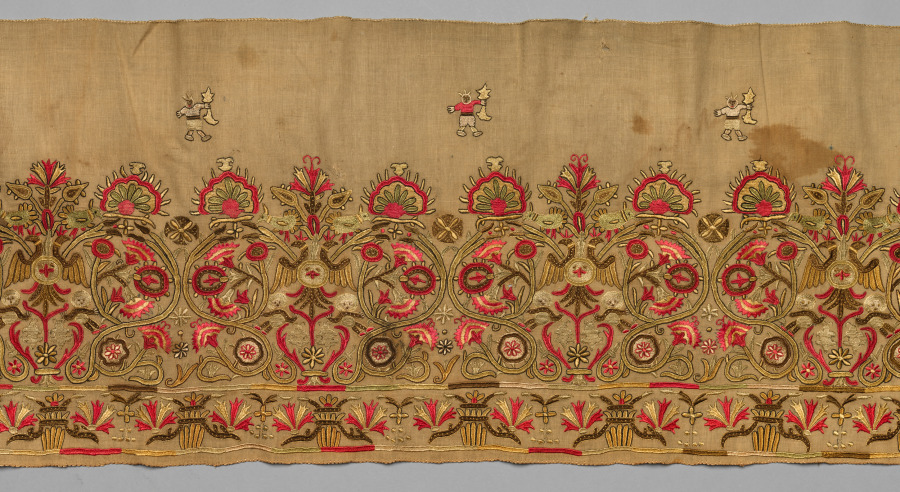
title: Complete Skirt Border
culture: Greece, Crete, 18th century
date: 1700s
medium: embroidery: silk on linen tabby ground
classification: Embroidery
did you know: Above the repeating floral motifs stand six small, evenly spaced figures wearing crowns and carrying maces.